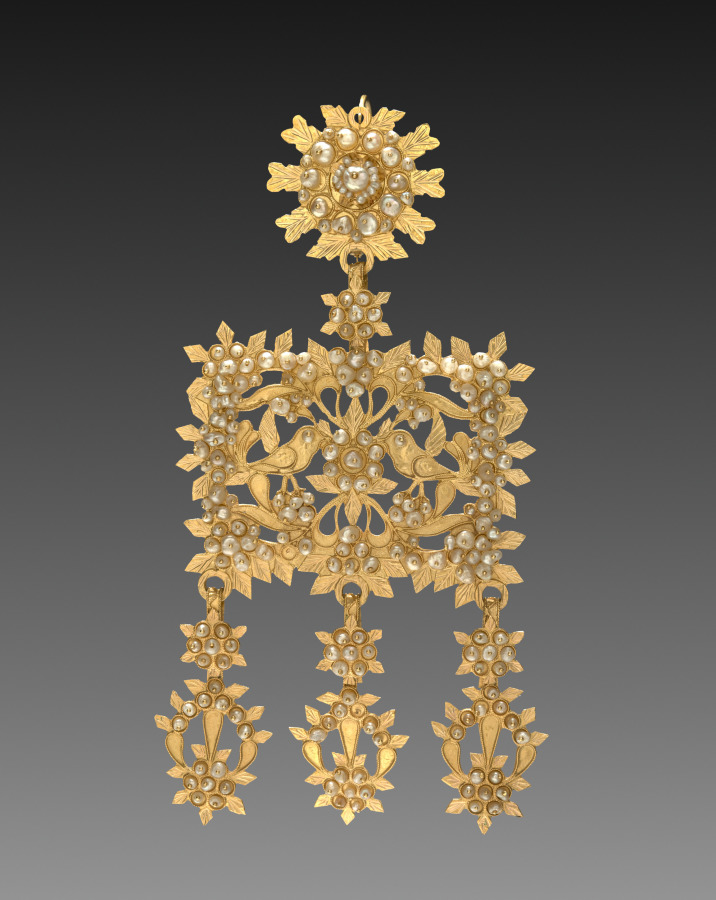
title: Earring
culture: Italy, Sardinia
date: 1700s - 1800s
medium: gold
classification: Jewelry